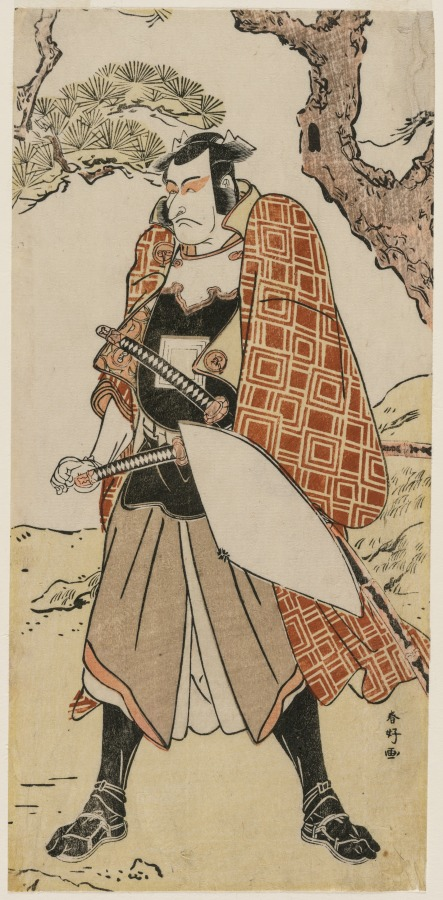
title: Ichikawa Danjuro V as a Travelling Warrior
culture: Japan, Edo period (1615–1868)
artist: Katsukawa Shunkō (Japanese, 1743–1812)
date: late 1780s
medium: color woodblock print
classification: Print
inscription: Signature: Shunko ga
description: Ichikawa Danjuro V was a talented onnagata (female impersonator) and writer.